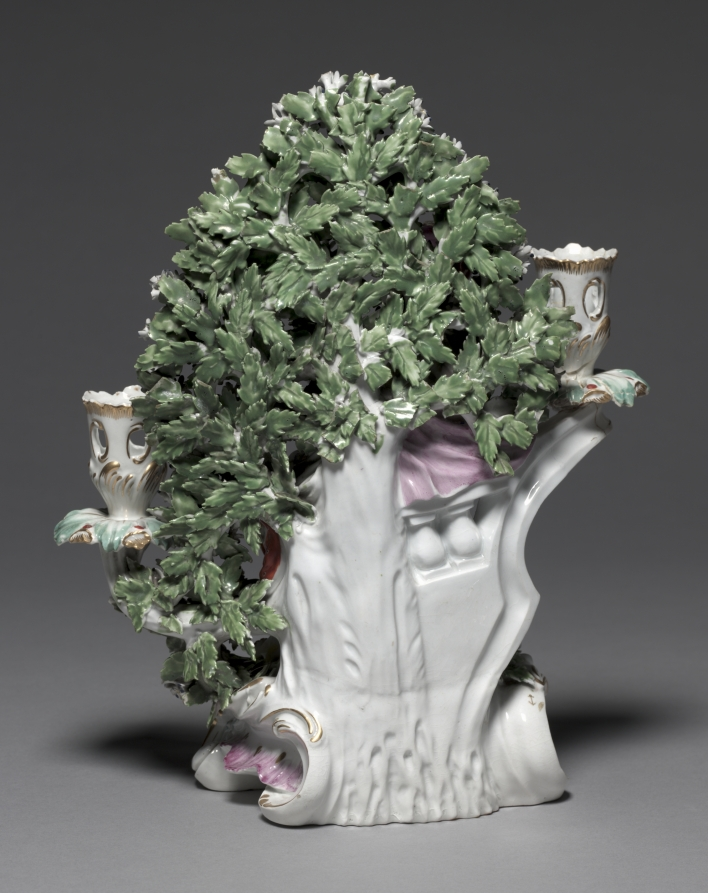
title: Candelabrum Depicting an Allegorical Figure of Matrimony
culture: England, London, Chelsea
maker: Derby Porcelain Factory (Chelsea-Derby Period, 1770–84)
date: c. 1775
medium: soft-paste porcelain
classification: Ceramic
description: This allegorical figure depicts a shepherdess dressed in richly patterned garments. Here the figure (Matrimony) holds a birdcage in one hand and subtly directs the viewer’s gaze toward the sheep resting nearby with the other. An accompanying figure, a shepherd (Liberty) is joined by a dog and a bird that perches on his outstretched arm.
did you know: The canopy of foliage surrounding these figures was inspired by the arbors popular in theatrical stage designs during the mid-1700s.